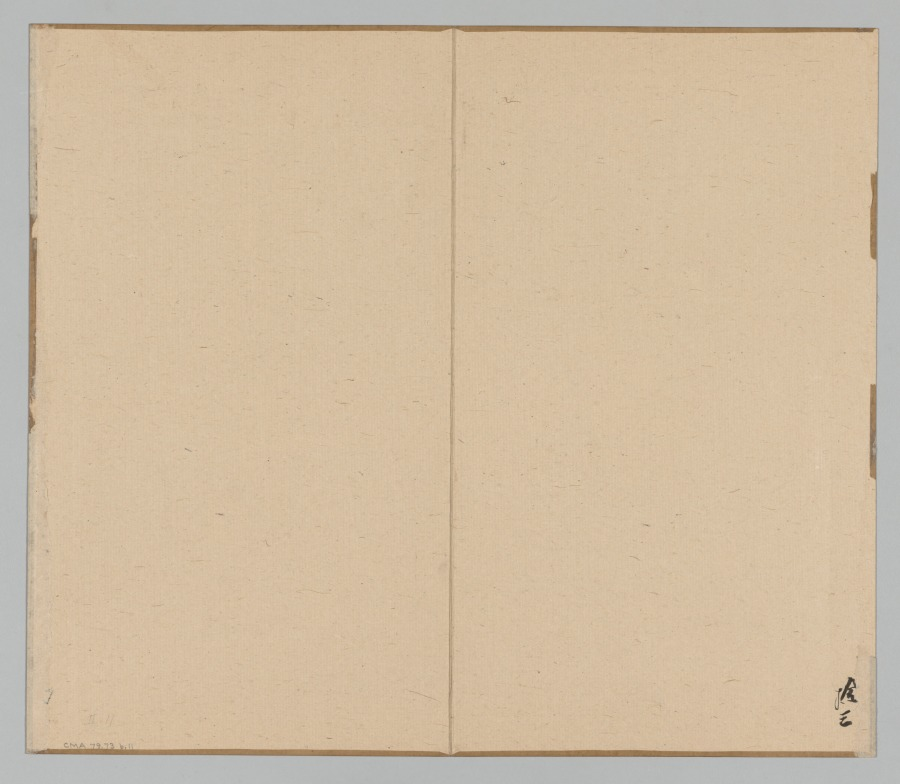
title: Reverberations of Taiga, Volume 2 (leaf 11)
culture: Japan, Edo period (1615–1868)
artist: Aoki Shukuya (Japanese, d. 1802)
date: mid- to late 1700s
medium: double-leaf from a pair of albums; ink and light color on paper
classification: Portfolio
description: Traditionally, young painters in Japan began their studies with an established master-painter. The master's compositions invariably became models that the apprentice copied to learn various ink and brush techniques. Shukuya was a pupil of the famous Kyoto artist Ikeno Taiga, whose style is reflected in these sketches of rocks, trees, and mountains.